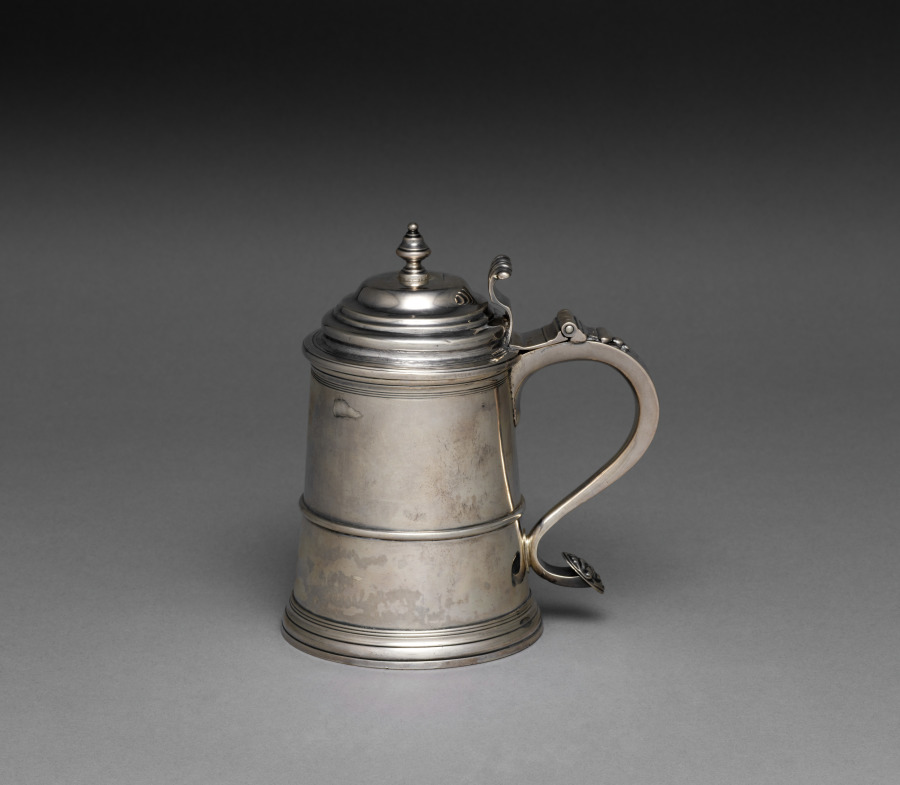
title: Tankard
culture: America, Massachusetts, Boston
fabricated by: John Coverly (American, 1800)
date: c. 1760–80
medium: silver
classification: Silver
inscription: Engraved on handle: "P" over "I * H".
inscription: Stamped on lid: "Coverly"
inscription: Stamped underside: "I.COVERLY".